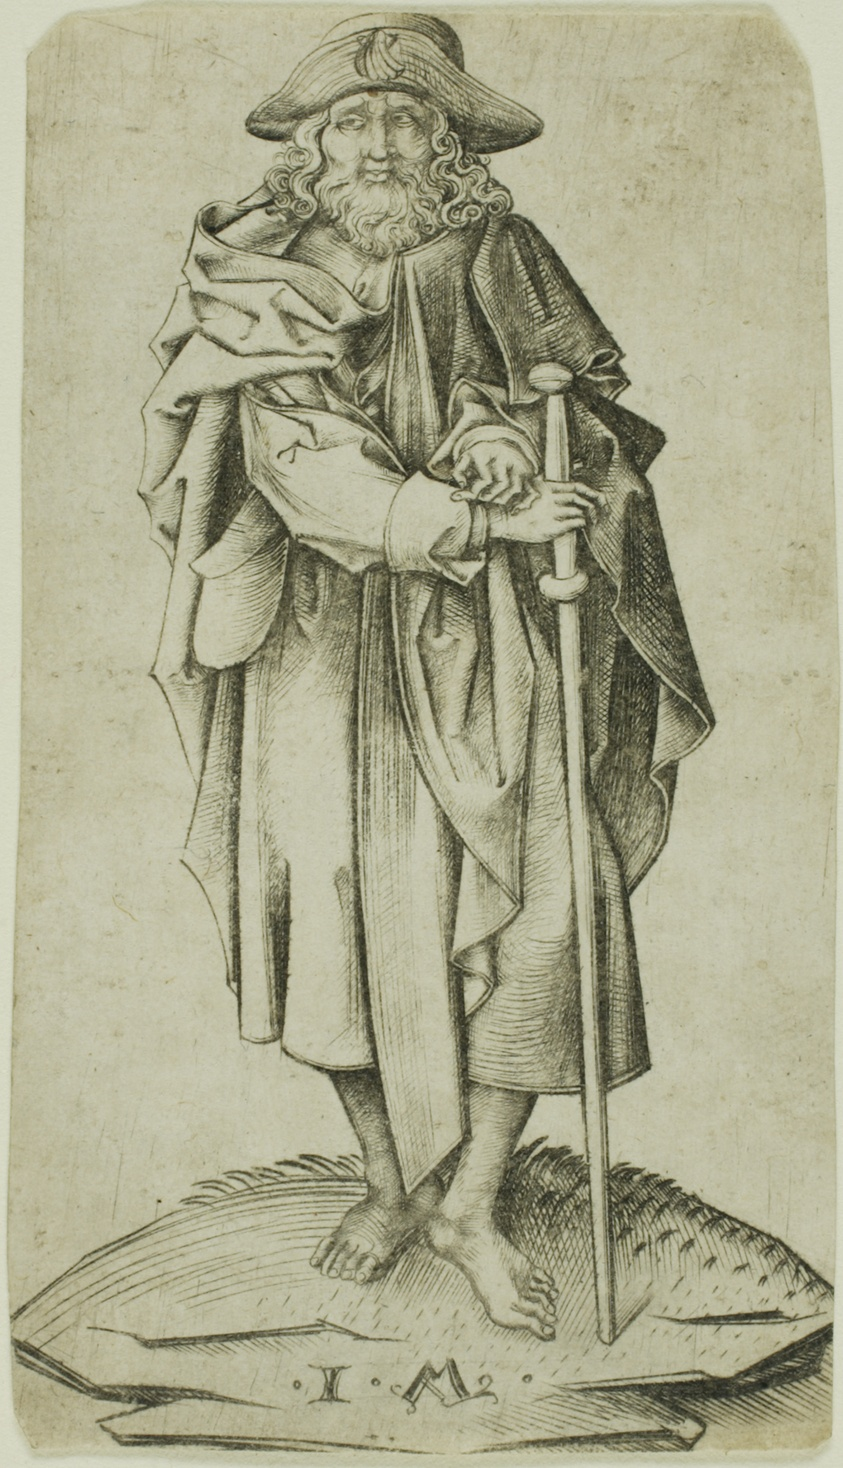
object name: Print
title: St. James Major, from Christ and the Apostles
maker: Israhel van Meckenem the Younger (German, c. 1440/45-1503); after Martin Schongauer (German, c. 1430/50-1491)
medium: Engraving on ivory laid paper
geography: Germany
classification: engraving; print; prints and drawing